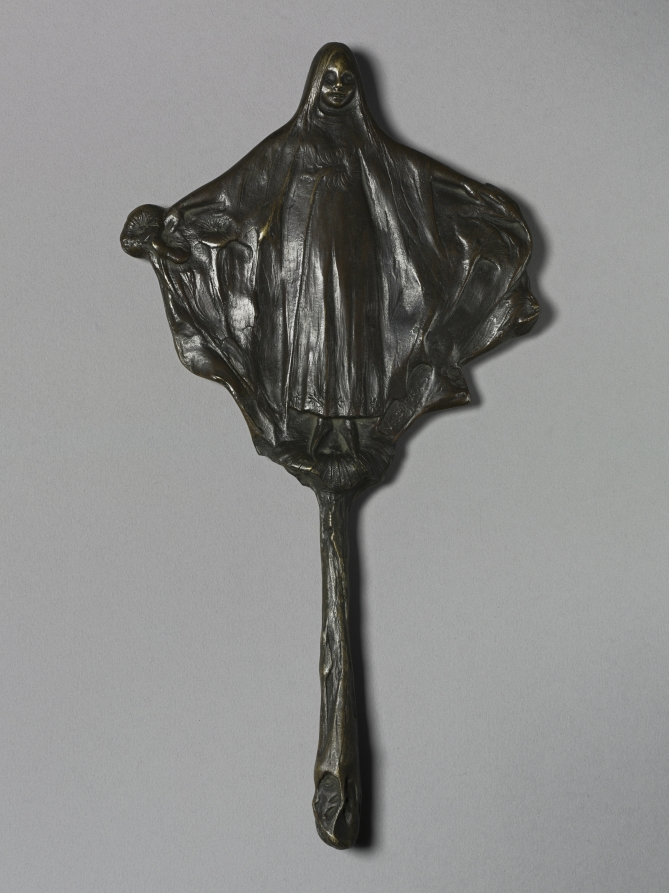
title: Hand Mirror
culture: Finland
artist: Villé Vallgren (Finnish, 1855–1940)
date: c. 1895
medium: bronze and glass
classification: Metalwork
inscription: inscribed lower right: Vallgren.